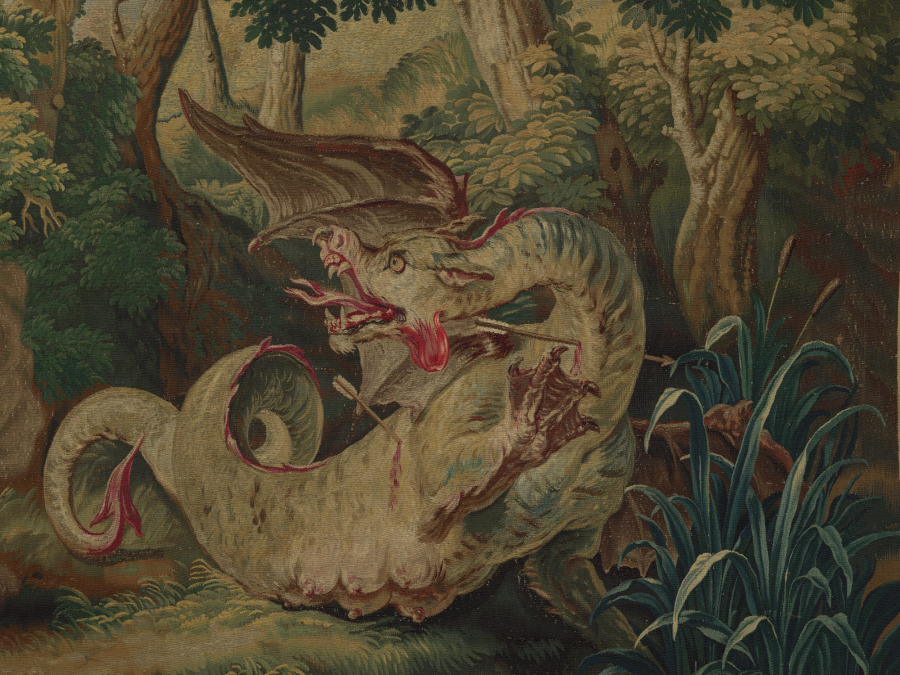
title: Apollo and the Serpent Python (from Set of Ovid's Metamorphoses)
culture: France, 18th century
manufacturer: Gobelins Manufactory (France, Paris, est. 1662)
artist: after Nicolas Bertin (French, 1668–1736)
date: 1700–1730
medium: tapestry weave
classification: Tapestry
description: Apollo’s dynamic posture with his right arm pulled back and his left holding a bow indicates that he has just shot the arrow piercing the snarling serpent’s throat and body. Apollo’s triumph over powerful Python, the fearsome serpent offspring of Mother Earth or Gaia, boosted his ego tremendously, leading to his tragically unsuccessful pursuit of Daphne. The regally dressed hunter and his prey are seen alone in an environment teeming with natural life that includes a pumpkin patch. In the creation of this textile, the manufacturer used blue and yellow dye to create the color green which has since degraded, causing the pumpkins and their leaves to appear blue.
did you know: During the French Revolution, Gobelins tapestries were sometimes disassembled to harvest the gold threads.